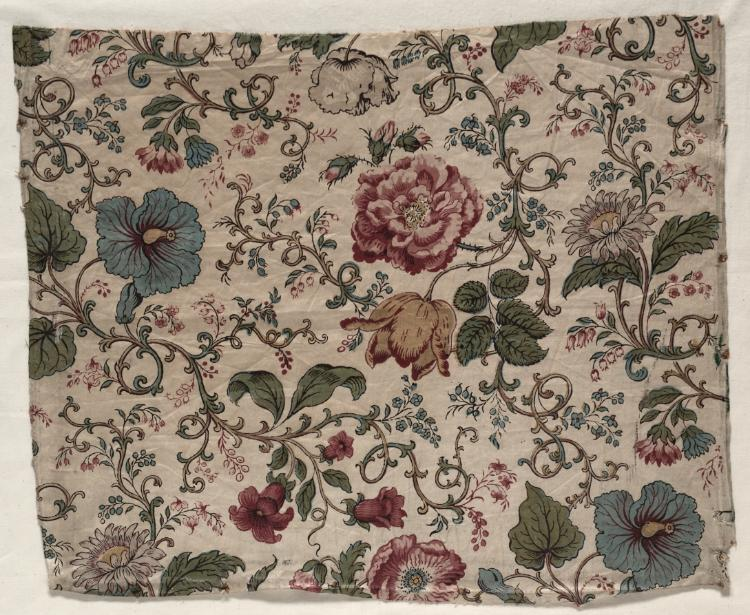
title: Woodblock Printed Chintz Fragment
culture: England, 19th century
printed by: Bannister Hall (British)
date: 1833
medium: woodblock print on cotton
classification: Textile